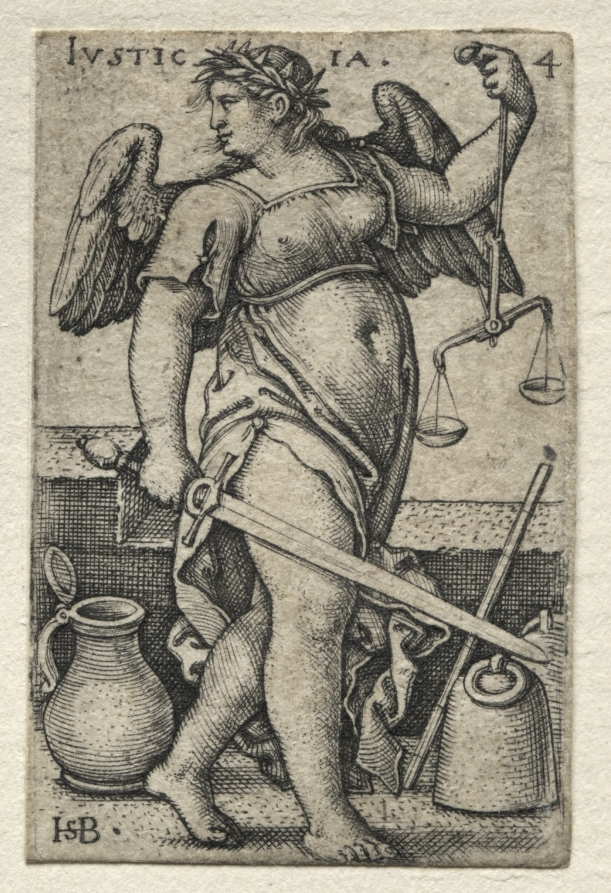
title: The Knowledge of God and the Seven Cardinal Virtues: Justice - Justicia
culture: Germany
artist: Hans Sebald Beham (German, 1500–1550)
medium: engraving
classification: Print